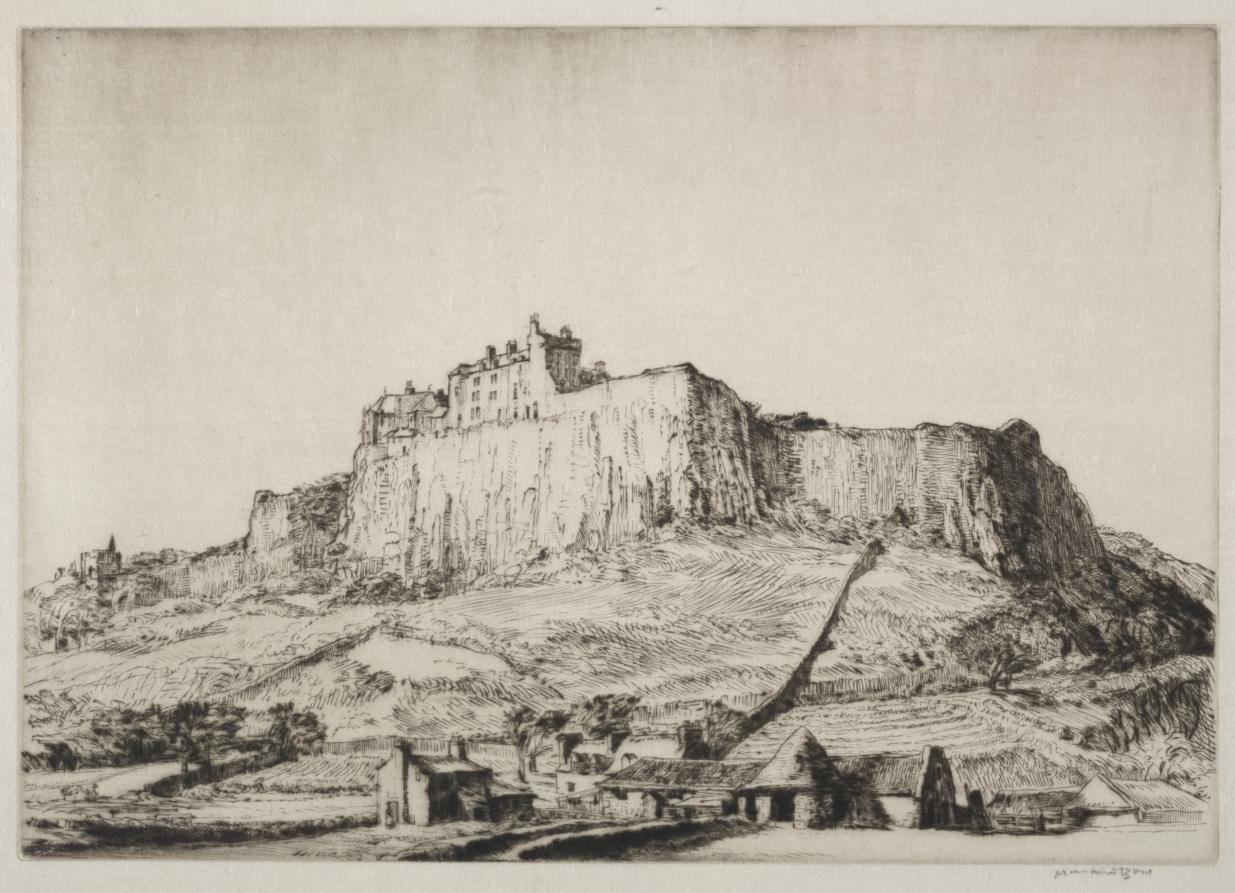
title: Stirling Castle, No. 2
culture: England, 20th century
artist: Muirhead Bone (British, 1876–1953)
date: 1909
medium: drypoint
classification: Print